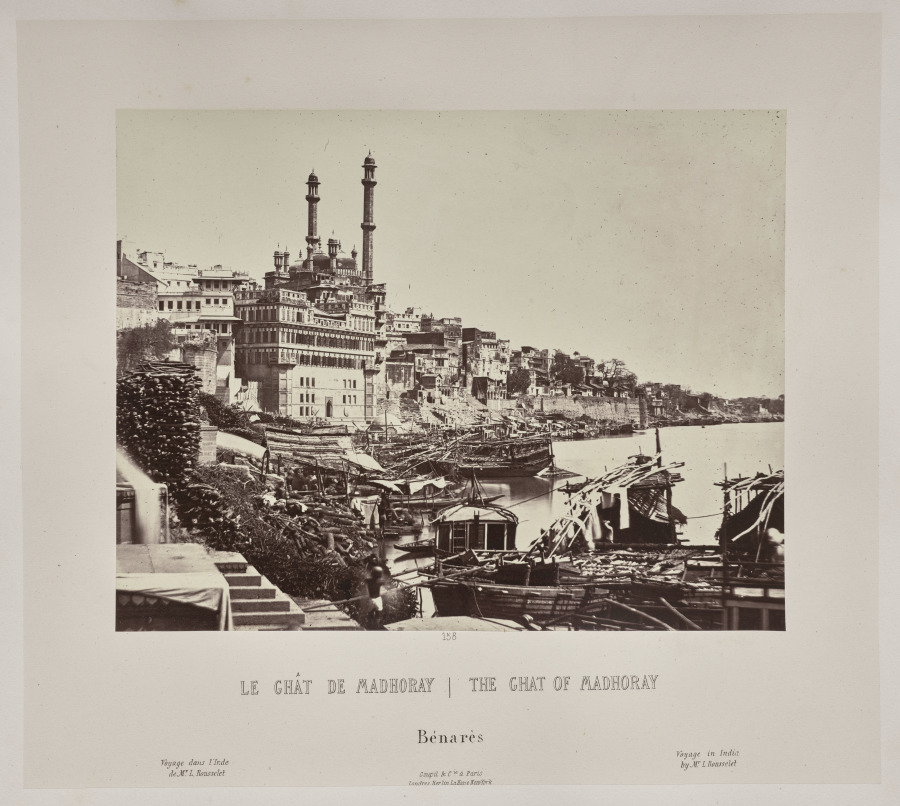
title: The Ghat of Madhoray, Bénarès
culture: France, 19th century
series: India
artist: Louis-Théophile Marie Rousselet (French, 1845–1929)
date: 1865–68, published 1869–70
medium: Albumen print from glass plate negative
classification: Photograph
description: Concerned that his drawings did not do justice to the splendor of India’s monuments, Rousselet learned photography in India that year, a remarkable accomplishment. He proved to be a talented photographer with a sophisticated sense of composition. The scenes in this volume sweep across sites of Sultanate, Rajput, and Mughal power in northern India, from the sacred Hindu city of Varanasi on the Ganges River to Alwar in Rajasthan. Also included are several scenes of industry and portraits of Indian rulers.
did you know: Louis Rousselet described himself as a “scientific traveler” when he went to India alone at age 18 in 1863 and stayed into 1868.